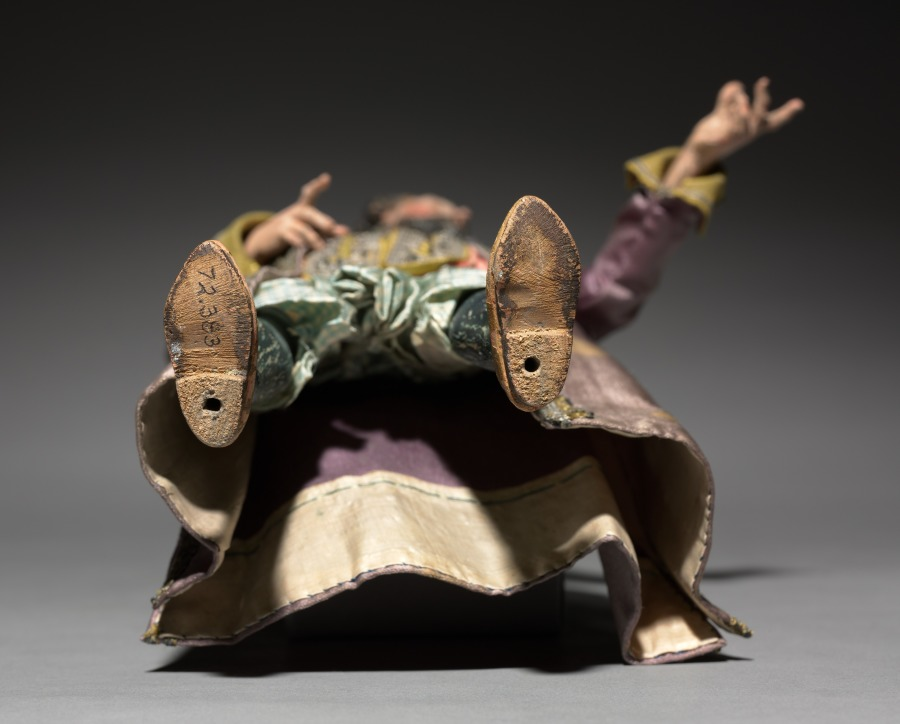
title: Figure from a Crèche: Standing Man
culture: Italy, Naples, late 18th-early 19th century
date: 1780–1830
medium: painted wood and terracotta with various textiles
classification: Sculpture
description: The practice of creating scenes of the Nativity for the home dates from the early 1700s in Italy, where people began to set up doll-like figures of about a foot or less in height. The custom was particularly popular in Naples around 1800, where crèche scenes (crèche means cradle, or crib) included many figures, whose heads and hands of painted terracotta, stuffed cloth bodies, and clothing adapted from contemporary local costumes gave them an amazingly realistic character. Representations of the birth of Jesus can be traced to the first few centuries of Christianity. Both living creatures and sculptural depictions of them were used from early times. By the late middle ages it was customary to create life-size figures of wood or stone, naturalistically painted, to represent the characters who participated in the events of Jesus's early life. These sculptures were then arranged in scenes illustrating one or both of the most important of these events, the Adoration of the Shepherds and the Adoration of the Magi—the three kings from the East who came to pay homage to the Christ child. Used in churches, these large figures were especially popular in Italy, Central Europe, Spain, and Portugal.